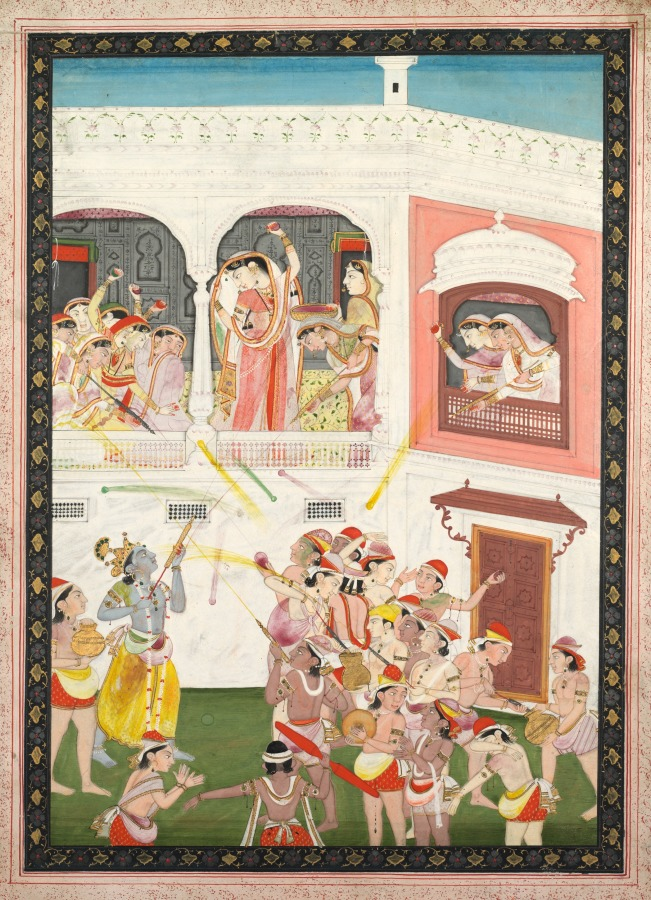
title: Radha and Hindu God Krishna celebrating the festival Holi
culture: Northern India, Pahari kingdoms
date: c. 1800–1810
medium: Gum tempera, ink, and gold on paper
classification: Painting